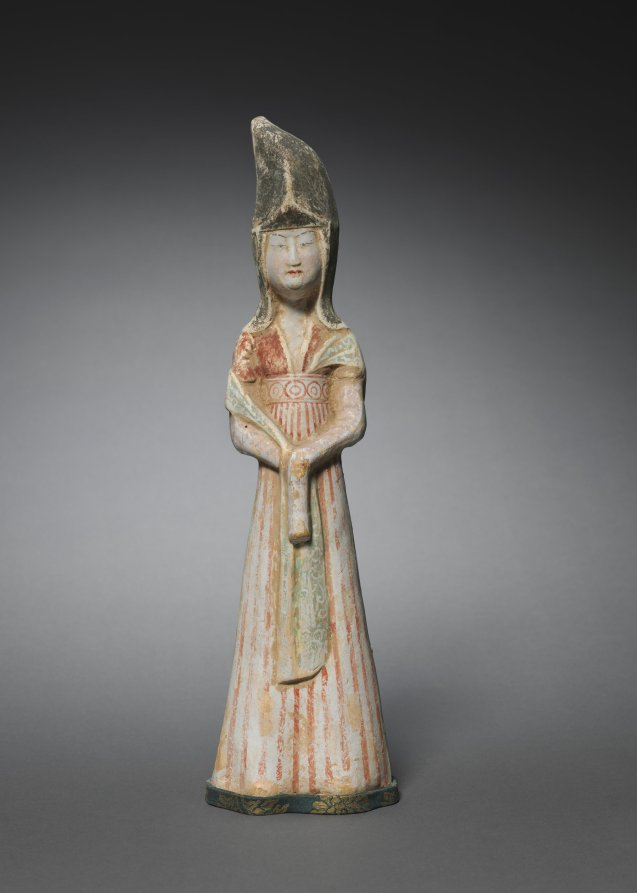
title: Court Lady with Tall Headdress: Tomb Figurine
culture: North China, Tang dynasty (618-907)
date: c. 700–750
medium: earthenware with polychromy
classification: Sculpture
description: There was prosperity and flourishing culture in the Tang dynasty. Their capital was at Chang’an, which is present-day Xi’an. There was great interaction with other cultures through trade, diplomacy, and artistic exchange along the Silk Road. Archaeological discoveries of earthenware figures, like this slender woman with a tall headdress, give a vivid picture of everyday life in 8th-century China. Aristocratic women had a high degree of freedom during the Tang dynasty, especially in contrast with the Neo-Confucianism of the later Song dynasty. Women were well educated and active; paintings exist of Tang women riding horses and participating in hunts and warfare, in addition to doing more courtly, traditionally feminine activities like dancing or making music.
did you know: Earthenware figurines like this one were placed in the tombs to accompany the deceased to the afterlife.